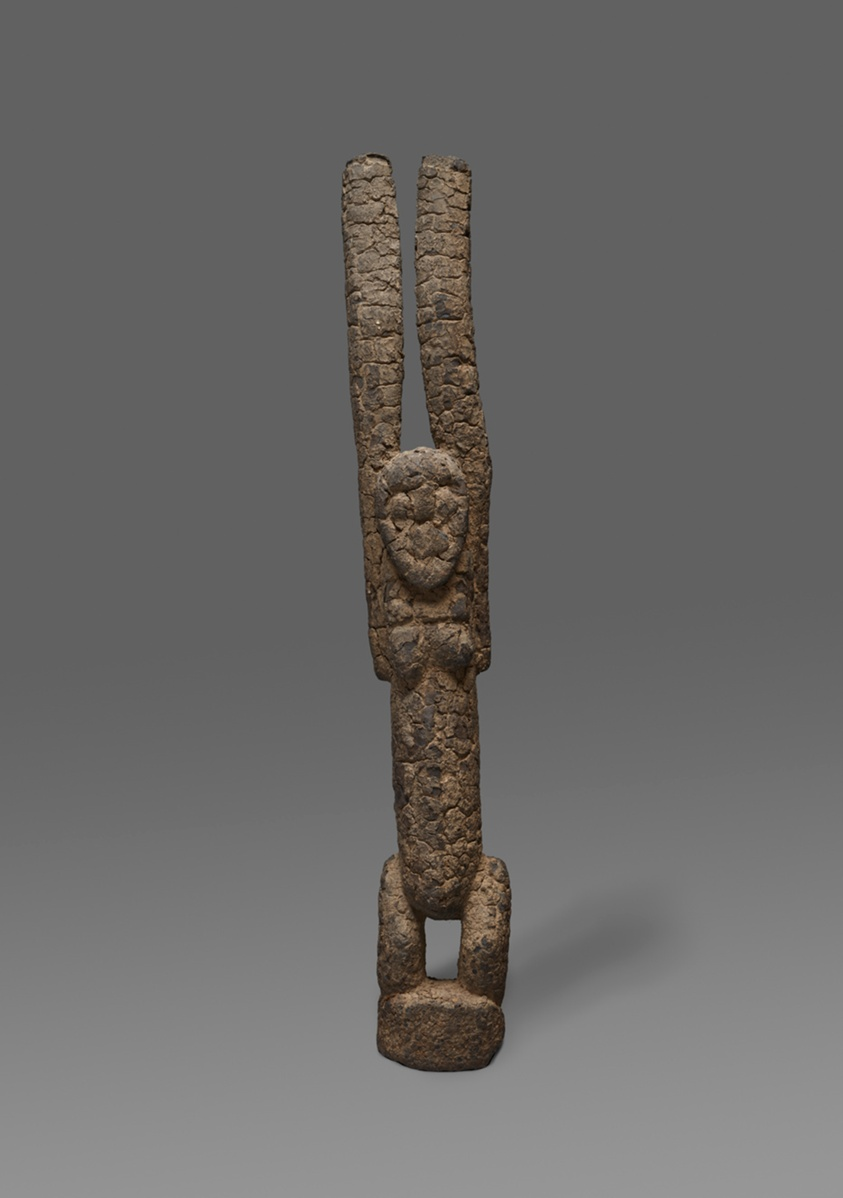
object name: Sculpture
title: Female Figure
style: tellem, Arts of Africa, mali kingdom, Northern Africa and the Sahel, dogon, african Art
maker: Tellem or Dogon; Bandiagara region, Mali; Northern Africa and the Sahel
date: 11th-19th century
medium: Wood and sacrificial material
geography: Mali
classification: sculpture; wood; arts of Africa; african art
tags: female, abstract figures, altar, rainfall, sacrifice, shrines